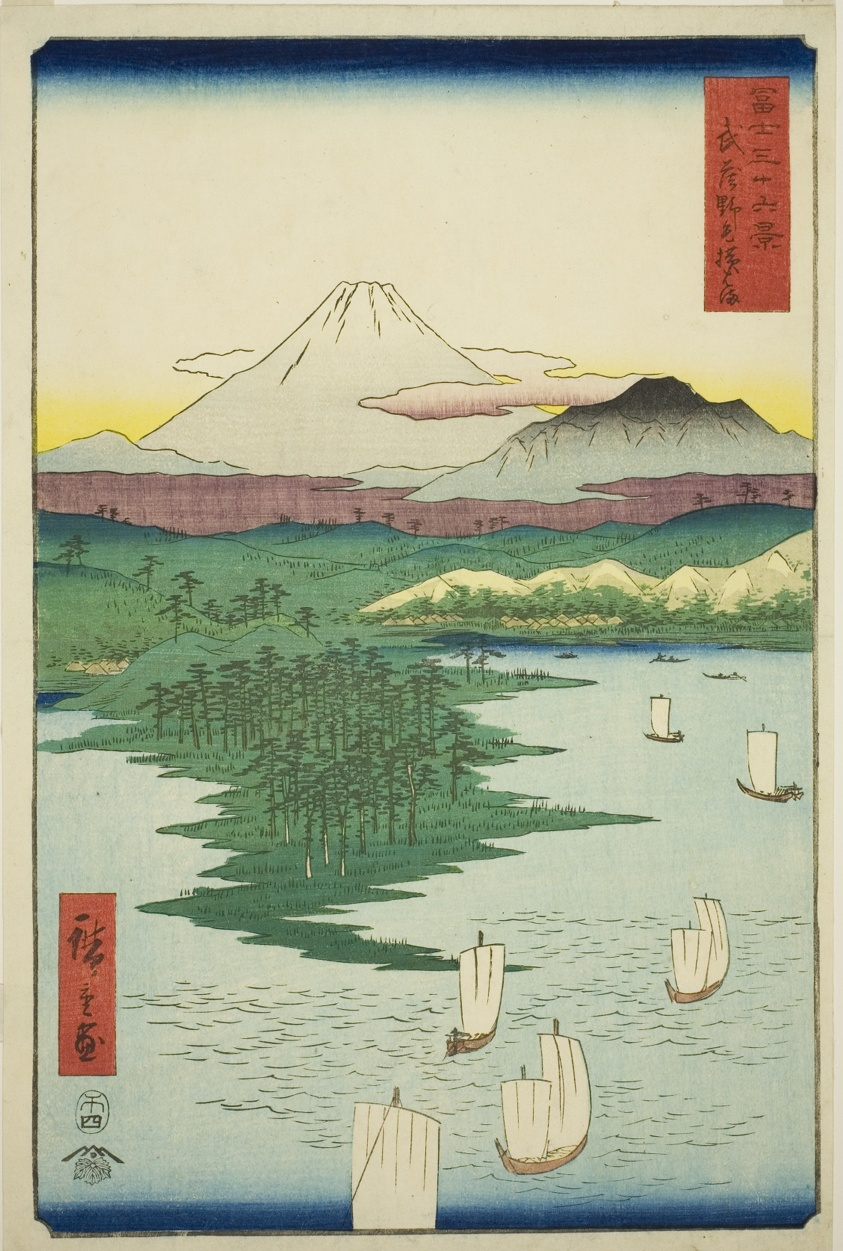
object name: Print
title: Yokohama at Noge in Musashi Province (Musashi Noge Yokohama), from the series "Thirty-six Views of Mount Fuji (Fuji sanjurokkei)"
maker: Utagawa Hiroshige 歌川 広重; Japanese, 1797-1858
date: 1858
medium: Color woodblock print; oban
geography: Japan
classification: woodblock print; print; asian art